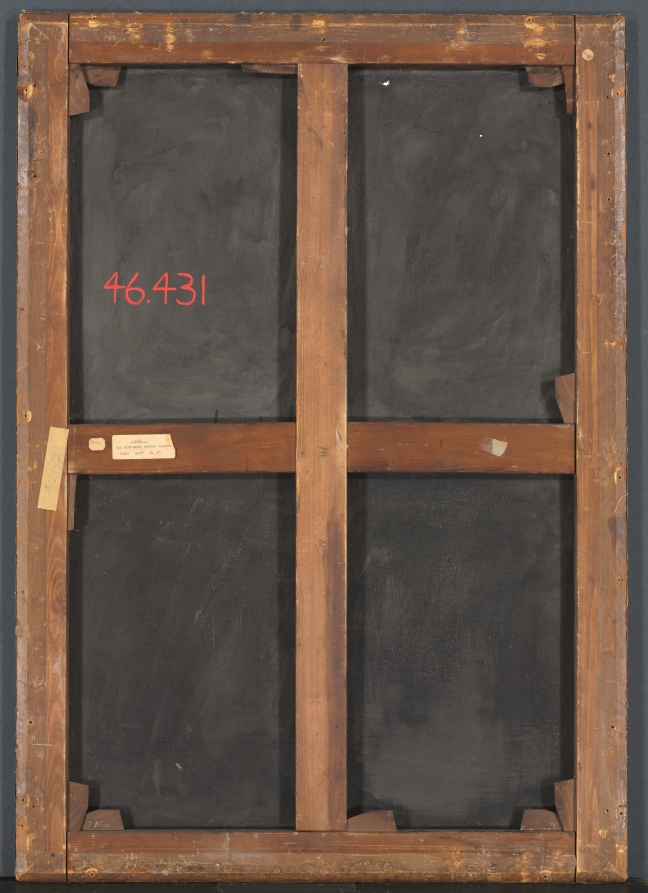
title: Portrait of Juan Maria Osorio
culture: Spain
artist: Agustín Esteve y Marques (Spanish, 1753–c. 1820)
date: c. 1786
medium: oil on canvas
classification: Painting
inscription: Inscribed at bottom: "EL Sr. Dn. JUAN MARIA, OSORIO, ALVAREZ. D TOLEDO; NACIO EN 28 DAGOSTO, D 1780 Y FALLECIO, EN."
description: Esteve y Marques enjoyed a successful early career as a court painter and society portraitist, working as an assistant to the Spanish painter Francisco de Goya before becoming court painter to King Charles IV. The young subject of this portrait is Juan Maria Osorio, one of three sons of Don Vicente Osorio Moscoso Fernandez de Cordoba, the 13th count of Altamira, who also commissioned multiple family portraits from Goya. Esteve and Goya often shared aristocratic patrons, and there are also portraits of the count and his wife attributed to Esteve. The portrait of Juan Maria is somewhat static in execution, the subject lacking vigor and psychological intensity in Esteve's depiction. Yet some of the stiffness of the Cleveland portrait may be due to the fact that this work was probably a posthumous portrait of Juan Maria, who died in 1785 at the age of five.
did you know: The boy holds a string attached to a linnet, a type of finch popular as a pet.